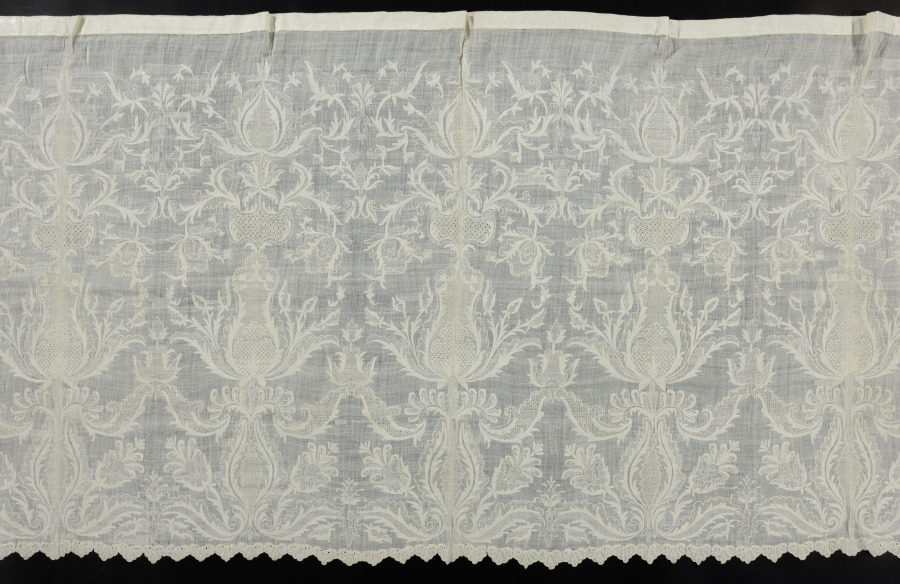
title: Lace Flounce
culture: Unassigned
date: 1700s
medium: Plain weave linen: embroidered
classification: Embroidery